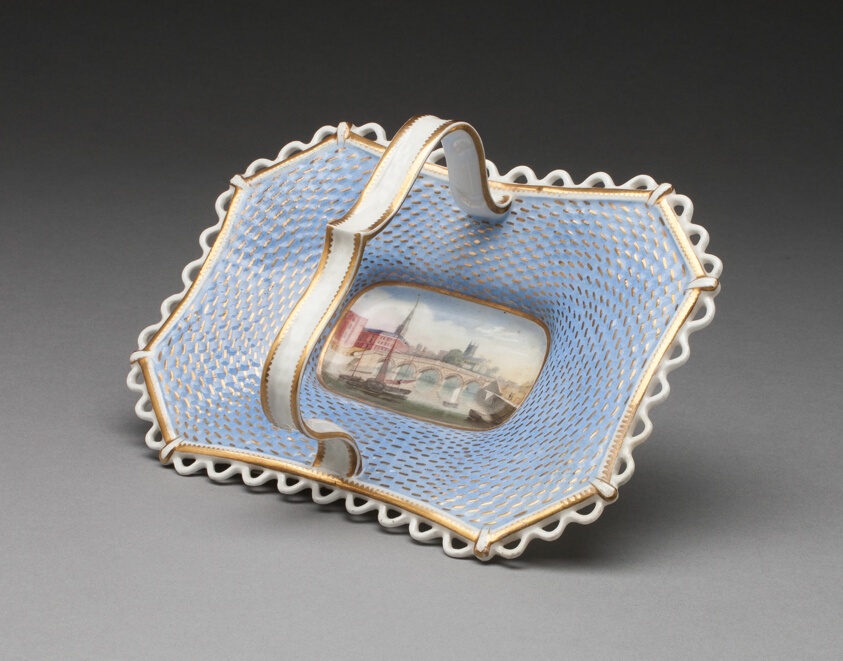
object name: Ceramics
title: Dessert Basket with view of Worcester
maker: Worcester Porcelain Factory (Chamberlain & Co. Period, 1840—1852); Worcester, England, founded 1751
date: 1840/50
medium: Soft-paste porcelain with polychrome enamels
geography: Worcester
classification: tableware; ceramics; porcelain; european decorative arts